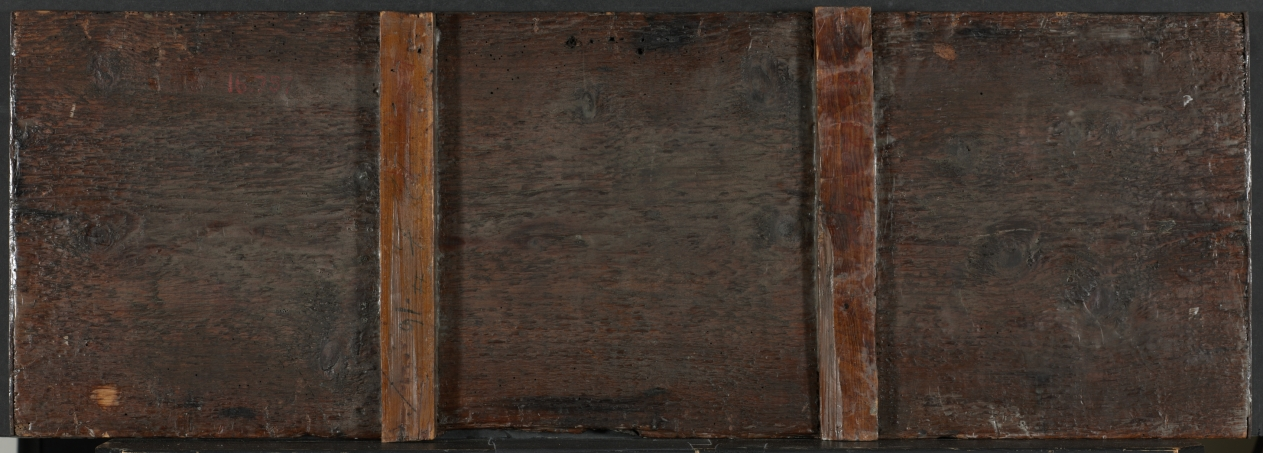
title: Death of the Virgin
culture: Italy, Venice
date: mid-1500s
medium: oil on wood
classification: Painting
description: This panel reveals a long history of changes. The initial work was painted on a single slab of wood, with strips left unpainted along the top and bottom. At an unknown time, the panel was probably cut down on the right and left sides, and the two blank strips at the top and bottom were filled in to enlarge the picture, most likely to fit its current, elaborately carved, 18th-century frame. Although these additions must have been initially more convincing, they were painted to match the yellowed and darkened original image, and thus no longer match the original paint. The flat and mismatched handling of the draperies in the lower portion also signal the intervention of a subsequent hand. The painting may have been part of an altarpiece as the predella, a long, horizontal painting along the base. The bottom of this panel exhibits signs of damage from fire and smoke, perhaps from the candles that could have been placed in front of it.